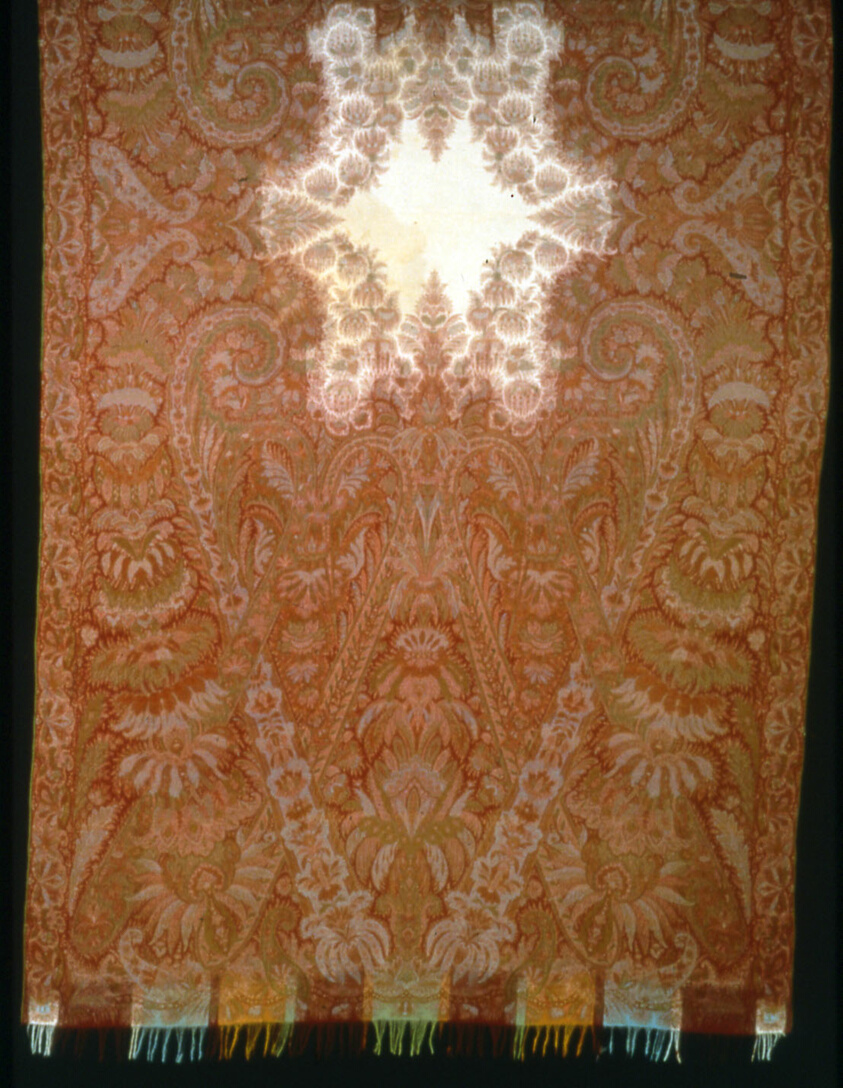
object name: Textile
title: Long Shawl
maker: Designed by Anthony Berrus (French, 1815–1883); Produced by Lion Frères; France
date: 1848/52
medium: Wool and cotton, warp threads dyed in multiple colors prior to weaving; center of weft-float faced 1:3 'Z' twill weave; patterned areas of warp-float faced 3:1 'Z' twill weave with supplementary patterning wefts bound in weft-float faced 1:3 twill interlacings; main warp fringe;woven on loom with Jacquard attachment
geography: France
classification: textile; weaving; costume accessory; costume